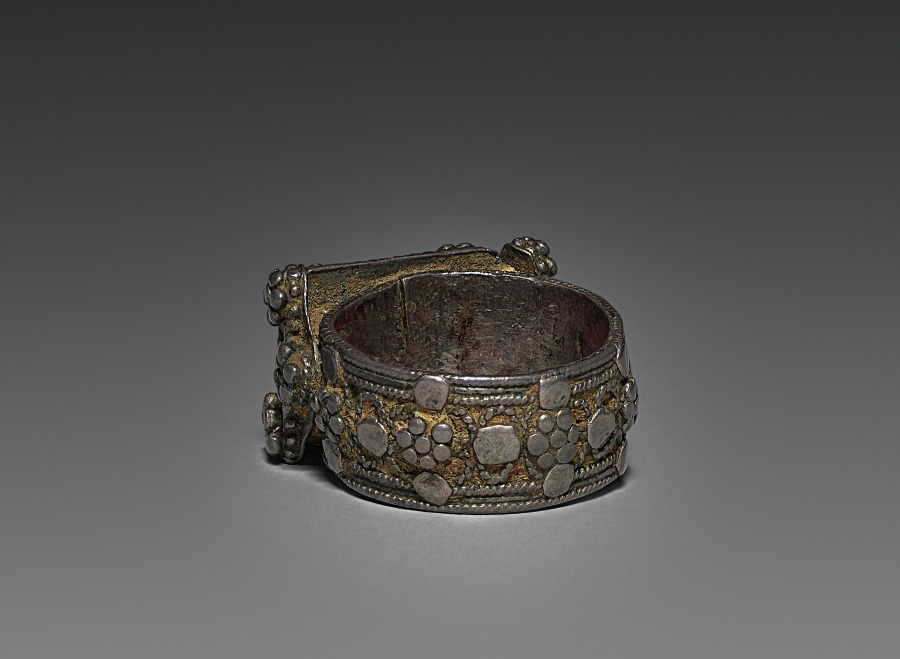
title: Ring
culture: India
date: 1800s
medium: silver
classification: Jewelry